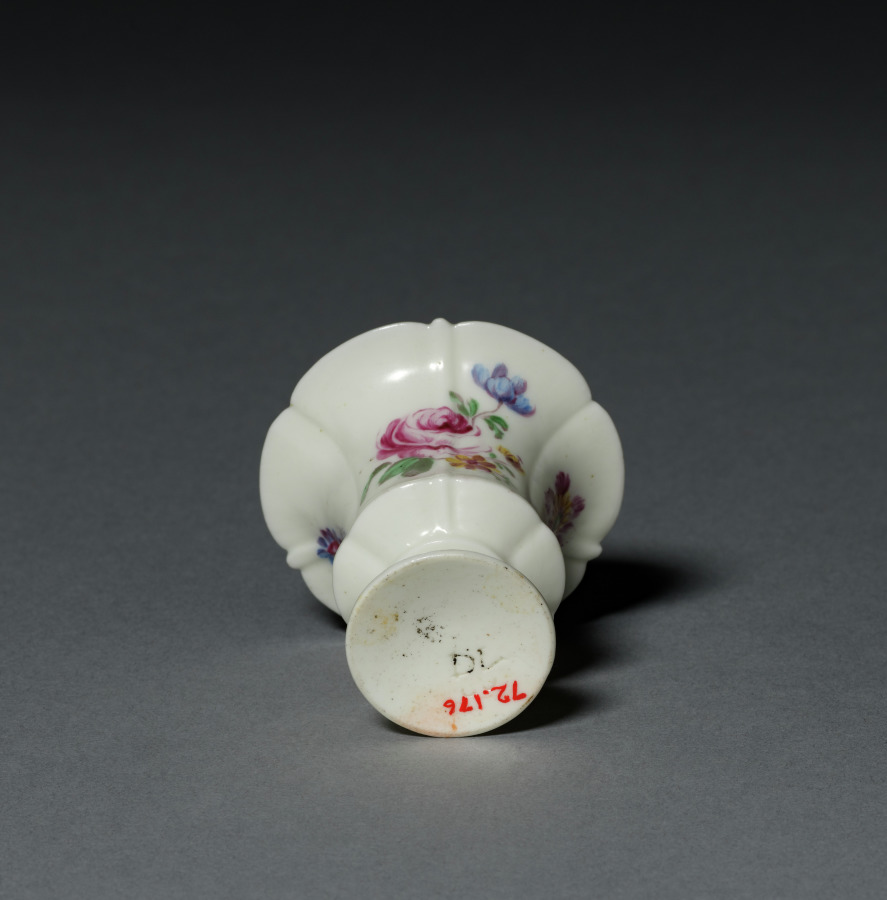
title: Small Urn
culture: France, Mennecy, 18th century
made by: Mennecy Factory (French)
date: c. 1750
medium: soft-paste porcelain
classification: Ceramic